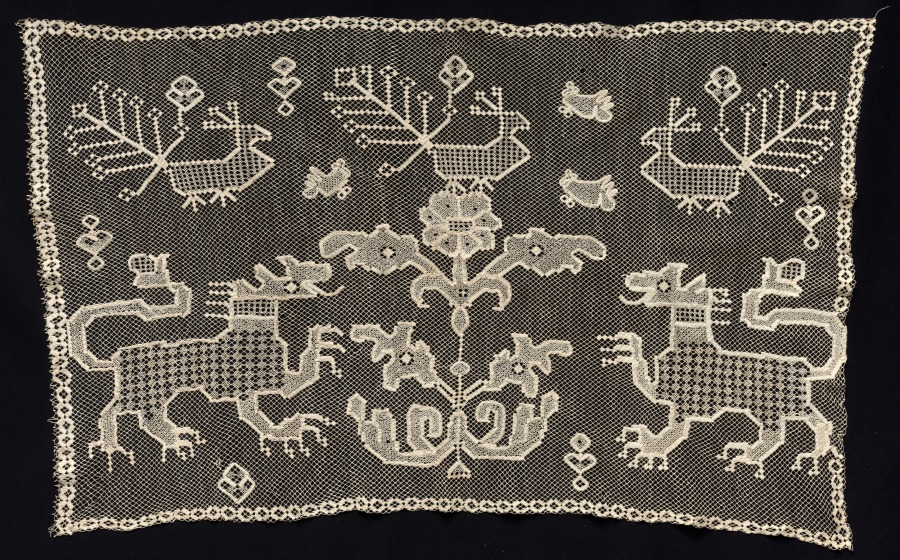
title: Panel with Panthers, Birds, and Floral Motifs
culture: Russia, Nizhniy Novgorod, 1700s-1800s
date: 1700s–1800s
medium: Bleached linen (est.): needle lace, filet/lacis (knotted ground and darned in one and two directions)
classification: Lace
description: In this panel, a pair of panthers, a common motif in Russian textiles, flank a stylized Tree of Life. Two different types of birds fly above the scene. One bird is small, while the other is larger and similar to a peacock. The diamond patterning and geometric motifs throughout this lace are characteristic of Russian “peasant laces.”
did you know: The Tree of Life, panther, and peacock are all ancient symbolic motifs introduced into lace patterns during the latter eighteenth century.